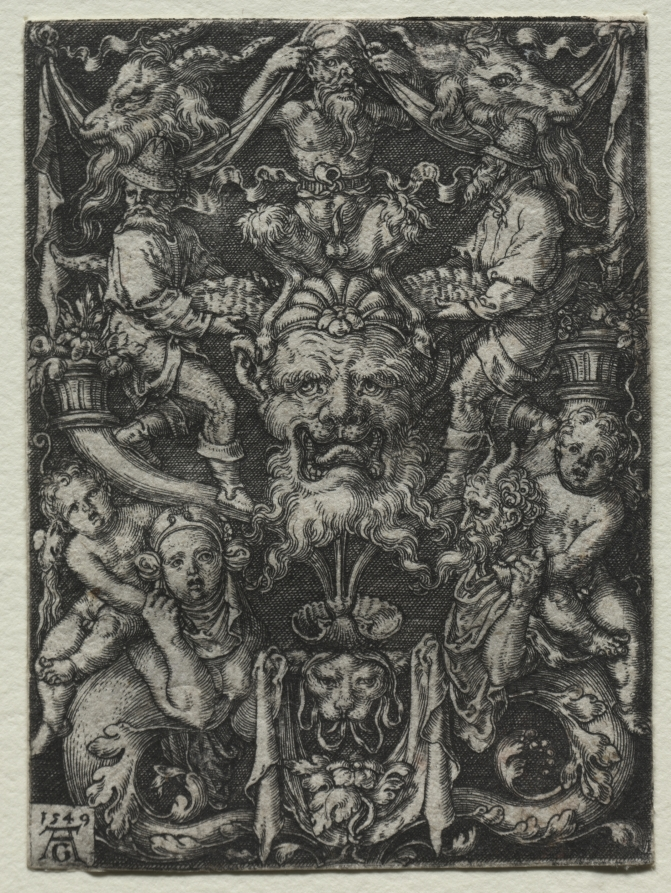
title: Ornament Design with a Mask, A Couple of Tritons, and Two Children Below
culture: Germany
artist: Heinrich Aldegrever (German, 1502–1555/61)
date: 1549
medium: engraving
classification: Print